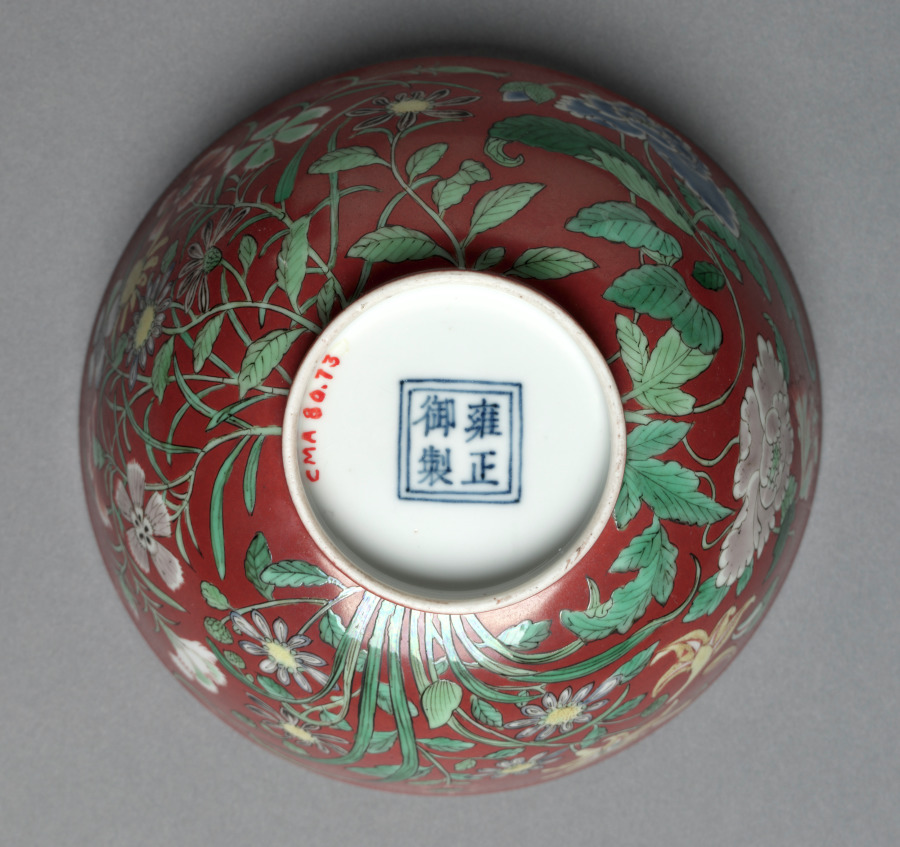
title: Bowl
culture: China, Jiangxi province, Jingdezhen kilns, Qing dynasty (1644-1911), Yongzheng mark and reign (1723-35)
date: 1723–35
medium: porcelain with overglaze enamel decoration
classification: Ceramic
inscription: 雍正御製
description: Flowers in vivid colors including peonies, lilies, and chrysanthemums are set against a brilliant red enamel ground. The petals and veins of leaves are depicted in fine outlines and soft colors demonstrating the craftsman’s excellent painting skill. This porcelain exemplifies the technical perfection of Qing dynasty court artisans who surpassed their predecessors in technical skill. The bowl bears a mark on its base reading “Made for Emperor Yongzheng 雍正御製.” The Yongzheng emperor was one of the three early Qing emperors whose taste greatly influenced art production and collecting.